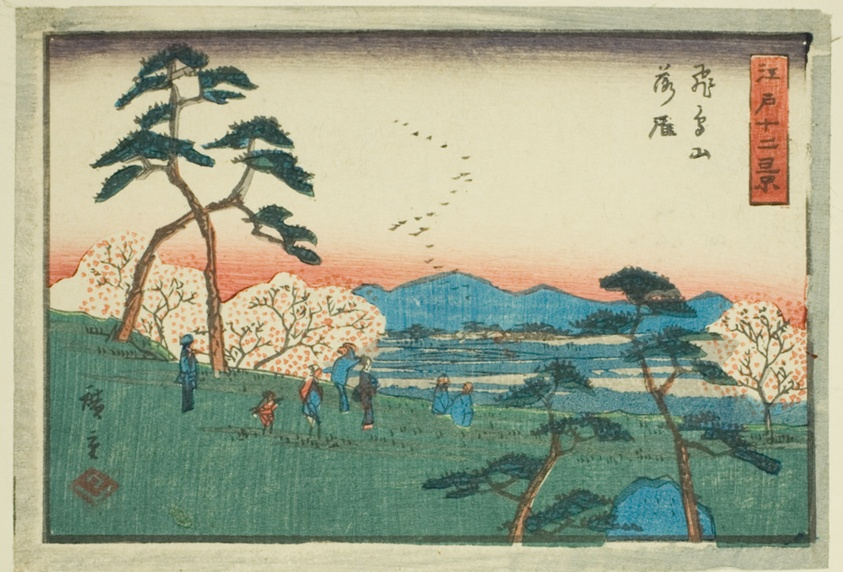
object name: Print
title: Descending Geese at Asuka Hill (Asukayama rakugan), from the series "Twelve Views of Edo (Edo juni kei)"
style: Japanese (culture or style)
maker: Utagawa Hiroshige 歌川 広重; Japanese, 1797-1858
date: c. 1847/52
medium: Color woodblock print; yotsugiriban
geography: Japan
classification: woodblock print; print; asian art